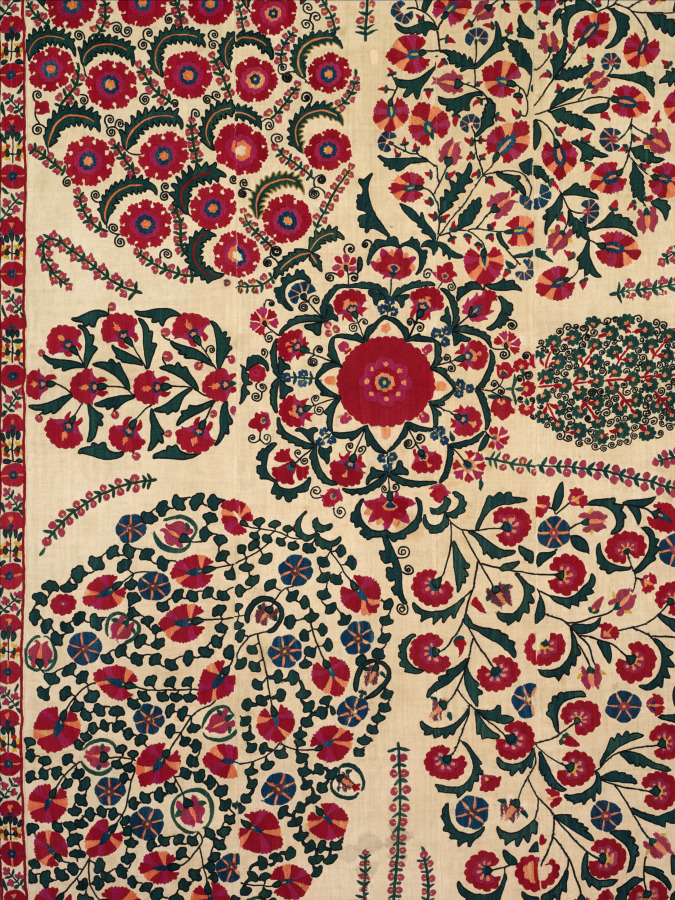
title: Suzani with floral sprays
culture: Central Asia, South West Uzbekistan, Shakhrisyabz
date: 1800–1850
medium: Cotton: plain weave, 6 strips; silk: embroidery; filling stitch: kanda xajol, occasionally bosma; outlining stitch: ilmoq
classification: Embroidery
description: Embroidered textiles were essential items in dowries. This type, known as a suzani after the Persian and Tajik word for needle, suzan, were created by mothers and daughters who proudly displayed them during wedding festivities and special occasions. This is an especially striking example, probably embroidered in Shakhrisyabz, located south of Samarkand in Uzbekistan, during 1800–1850. Suzani were made for numerous functions including the nuptial bed, curtains for storage niches, and wrappers for various dry goods. Floral and foliate motifs generally dominate as seen here, enriched with several shades of red and enhanced by the varied light reflections and colors of the silk thread. Possibly the motifs conveyed cosmological, apotropaic, medicinal, or fertility associations especially for married life. Patterns were drawn in black ink on several loosely joined cotton cloths by a skilled family member or a professional. The cloths were then separated, embroidered individually, and reattached, confirmed by mismatched motifs where the lengths are joined. They are generally attributed to nineteenth-century production after sericulture was introduced in the Merv area around 1800.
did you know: Six narrow lengths of handwoven cotton cloth were joined and then embroidered with vibrant silk thread to make this suzani.